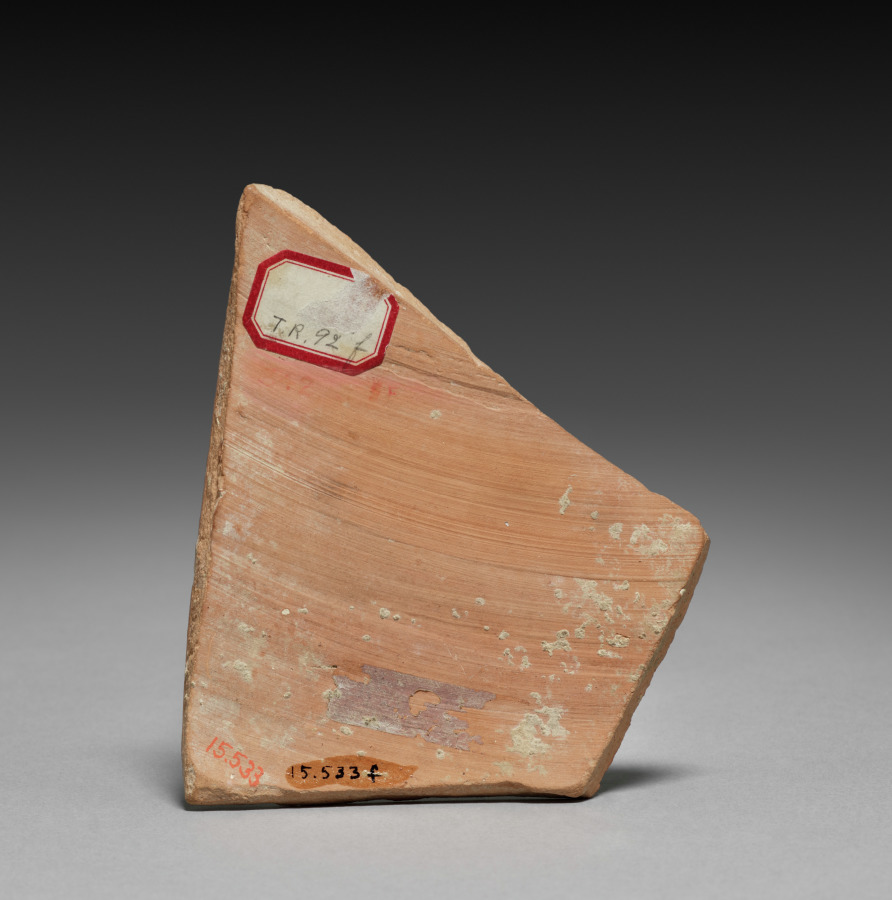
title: Fragment from Black-Figure Neck-Amphora of Panathenaic Shape (Storage Vessel): Apollo with Lyre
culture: Greek, Attic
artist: manner of Antimenes Painter (Greek, Attic, active c. 530–510 BCE)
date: c. 520 BCE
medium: ceramic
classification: Ceramic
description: With so little preserved, the precise subject once shown on this vase remains uncertain. Along with Apollo playing his lyre, parts of the mane and reins of a horse remain, suggesting a chariot procession—perhaps for the wedding of Peleus and Thetis, an event attended by the Olympian gods.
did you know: Although only two fragments survive from this vase, both show Apollo, here playing his lyre.